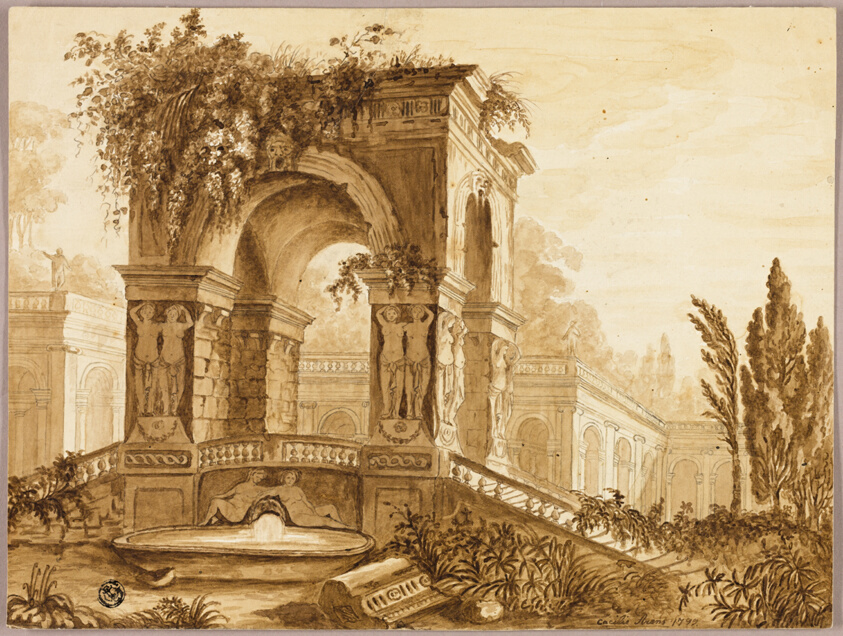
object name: Drawing and Watercolor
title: Portico in Ruins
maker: Cecilie Arens (German, 1750-1849)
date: 1799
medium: Brush and brown wash with graphite, on ivory wove paper, laid down on ivory laid paper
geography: Germany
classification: ink or chalk wash; drawings (visual works); prints and drawing